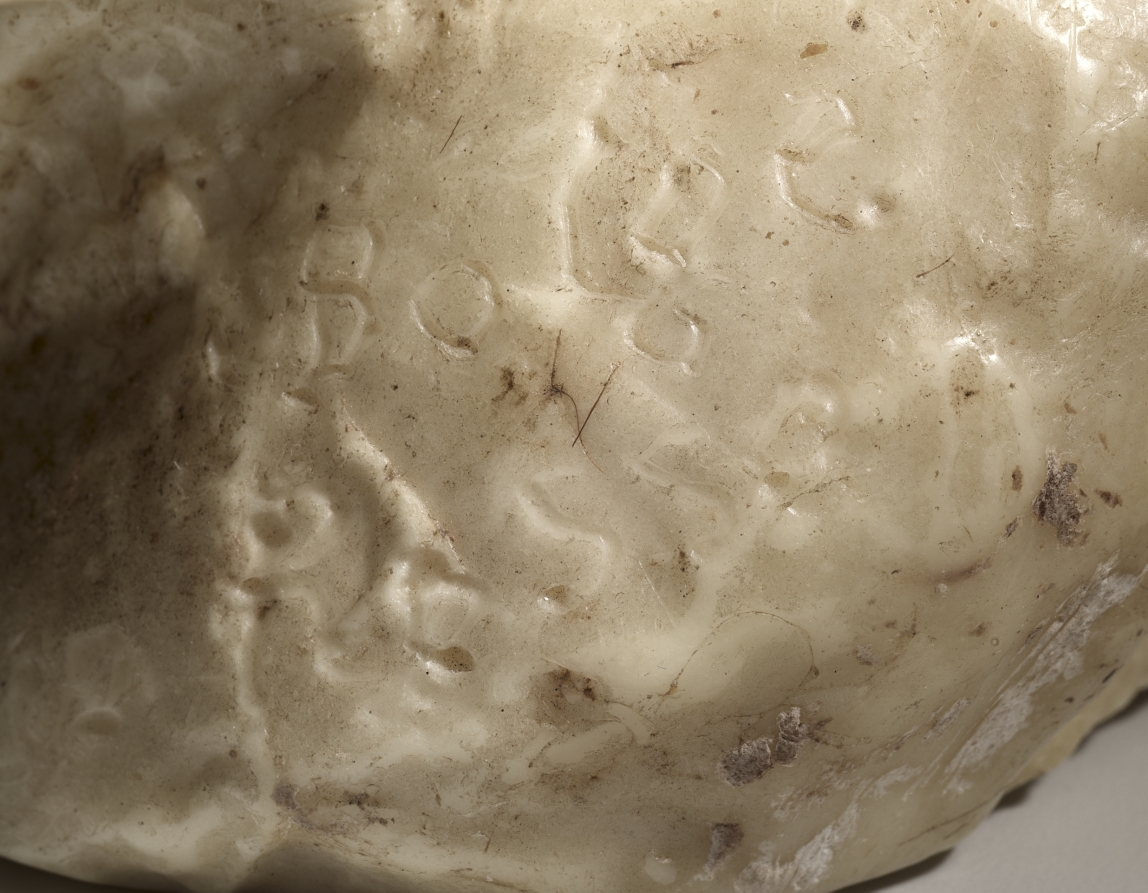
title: The Jewish Boy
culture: Italy, 19th century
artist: Medardo Rosso (Italian, 1859–1928)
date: c. 1892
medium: wax on plaster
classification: Sculpture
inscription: inscribed on left shoulder: "Bolgé/(M.?) Rosso."; inscribed inside: Danila Rosso Parravicini.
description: Medardo Rosso was a highly experimental sculptor who deliberately cultivated coarse, unrefined surfaces in his work. In this head of a boy—which the artist considered one of his most successful works—he effectively utilized the fluid properties of wax to suggest the fleeting movement of a child’s expression as well as the ephemeral nature of childhood.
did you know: Like the Impressionist painters of his time, Rosso sought to capture the fleeting and ephemeral qualities of light. However, he did not work directly from nature. His images were created from memory and emotion.